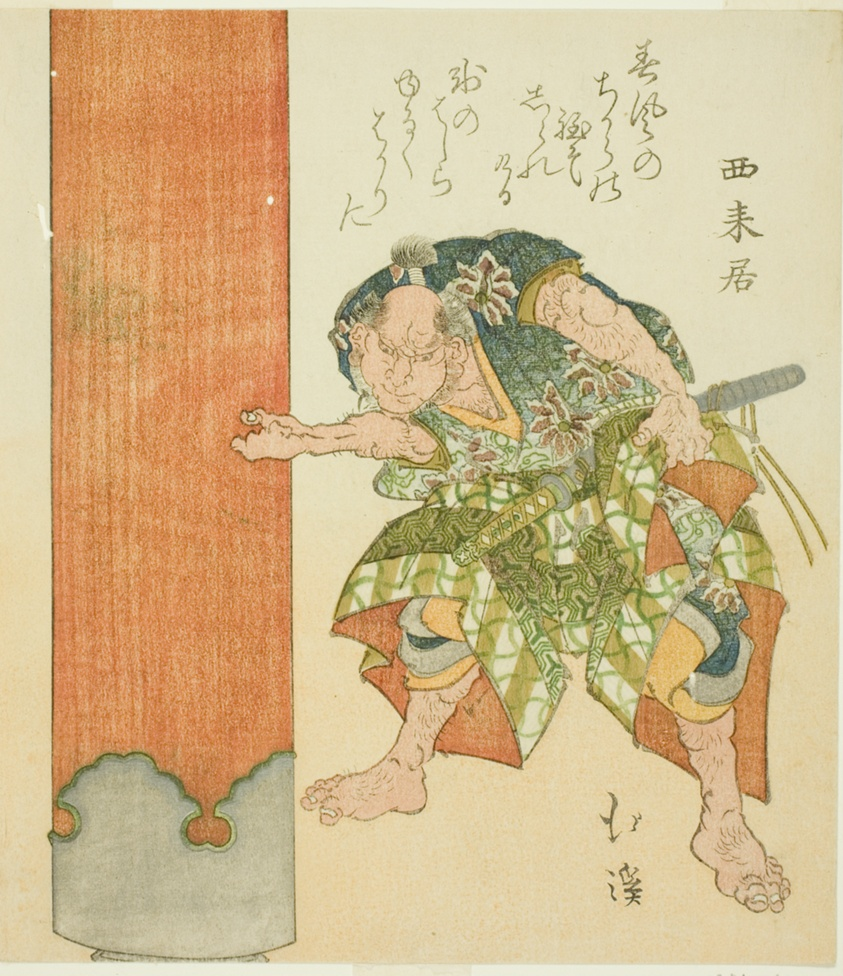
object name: Print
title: Strong man at pillar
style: Japanese (culture or style)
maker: Totoya Hokkei (Japanese, 1780–1850)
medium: Color woodblock print; shikishiban, surimono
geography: Japan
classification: woodblock print; print; asian art